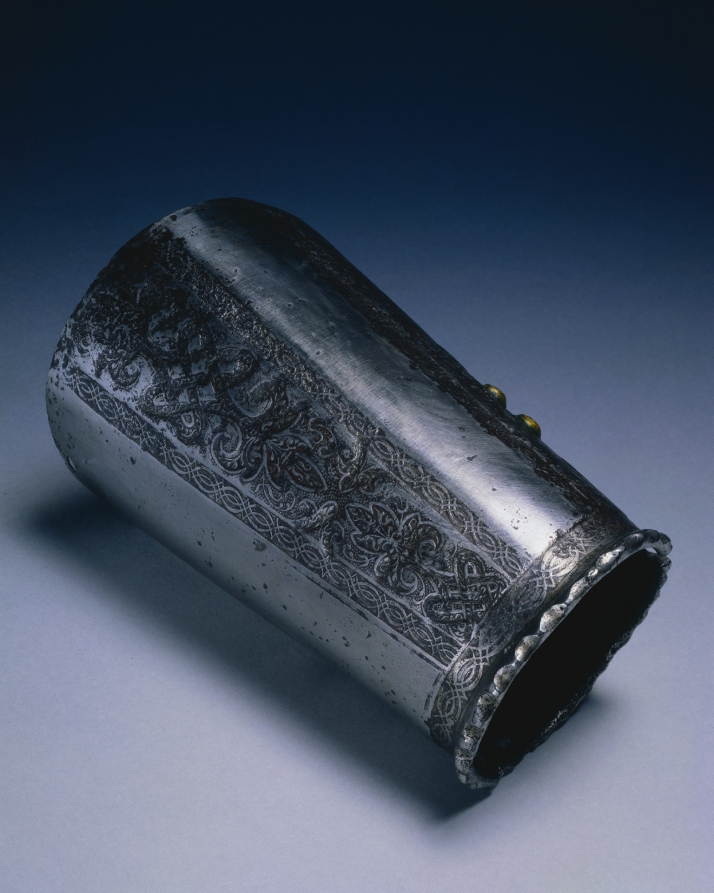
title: Vambrace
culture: Germany, Augsburg, 16th century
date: c. 1560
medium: steel, etched and lightly embossed with strapwork bands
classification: Arms and Armor